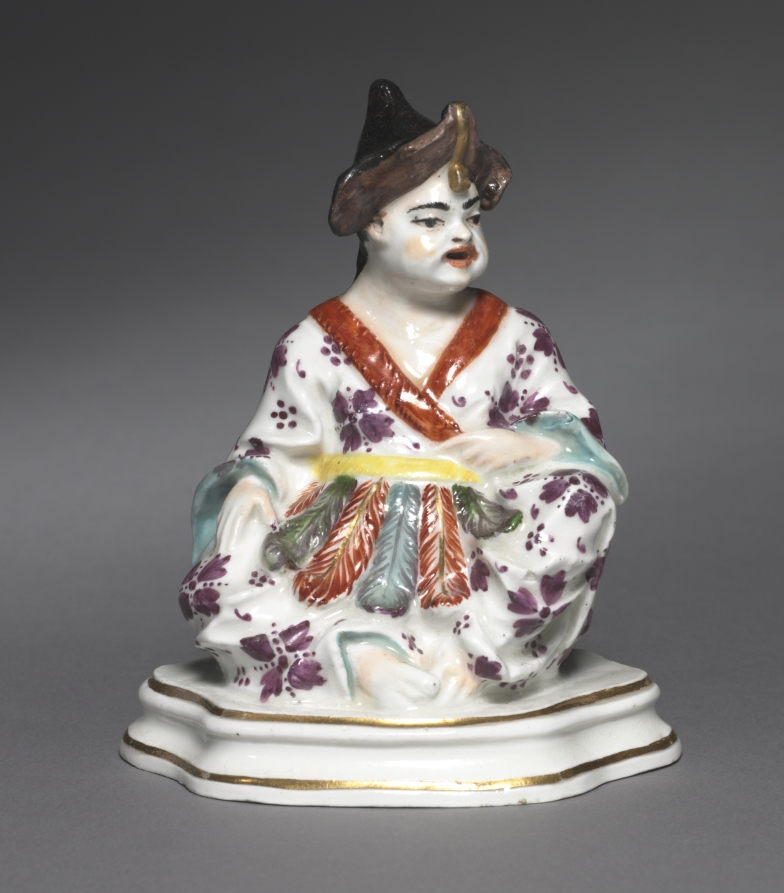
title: Seated Chinese Figure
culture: Germany, Meissen, 18th century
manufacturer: Meissen Porcelain Factory (German, est. c. 1710)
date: c. 1730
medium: porcelain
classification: Ceramic